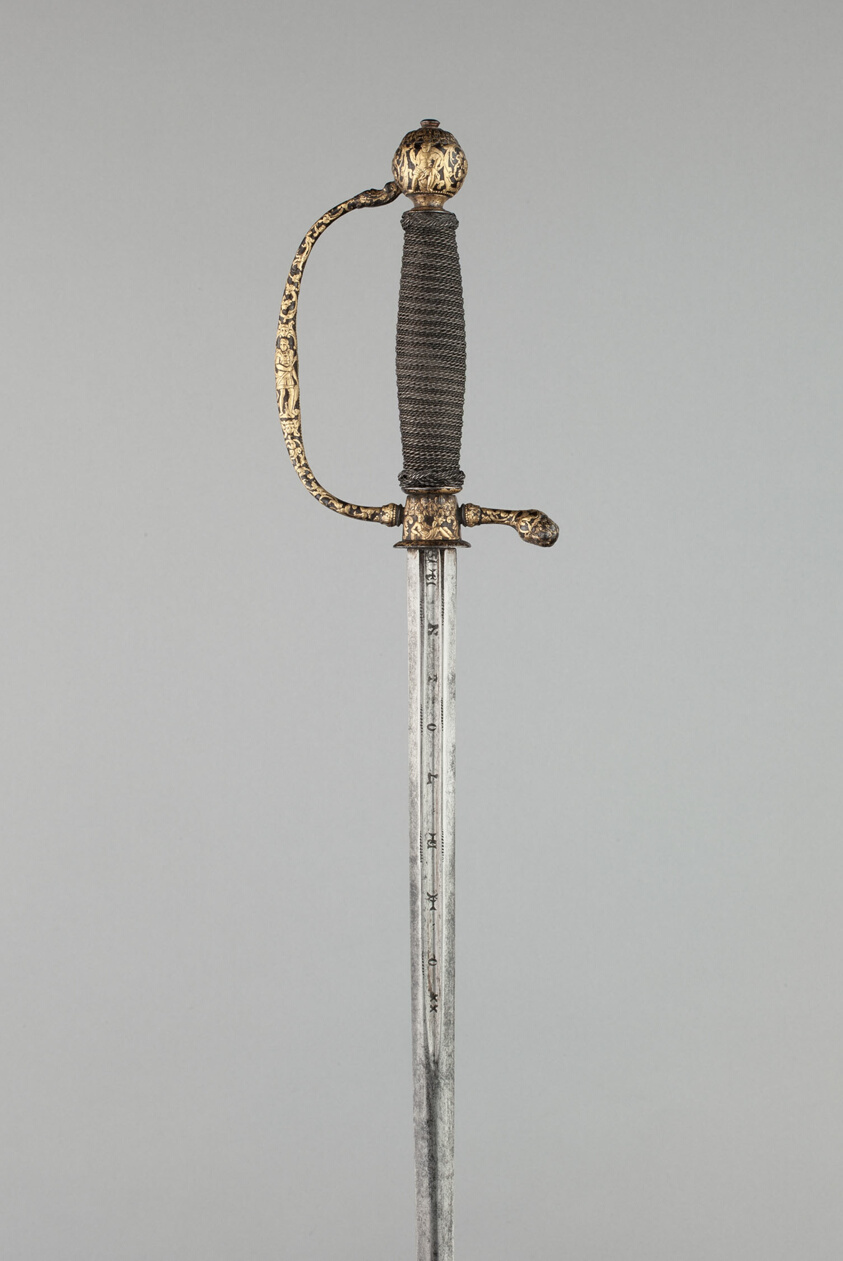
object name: Arms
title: Smallsword for a Child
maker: French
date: c. 1670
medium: Steel, iron, gold, silver, and wood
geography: France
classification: edged weapon-sword; arms; arms and armor